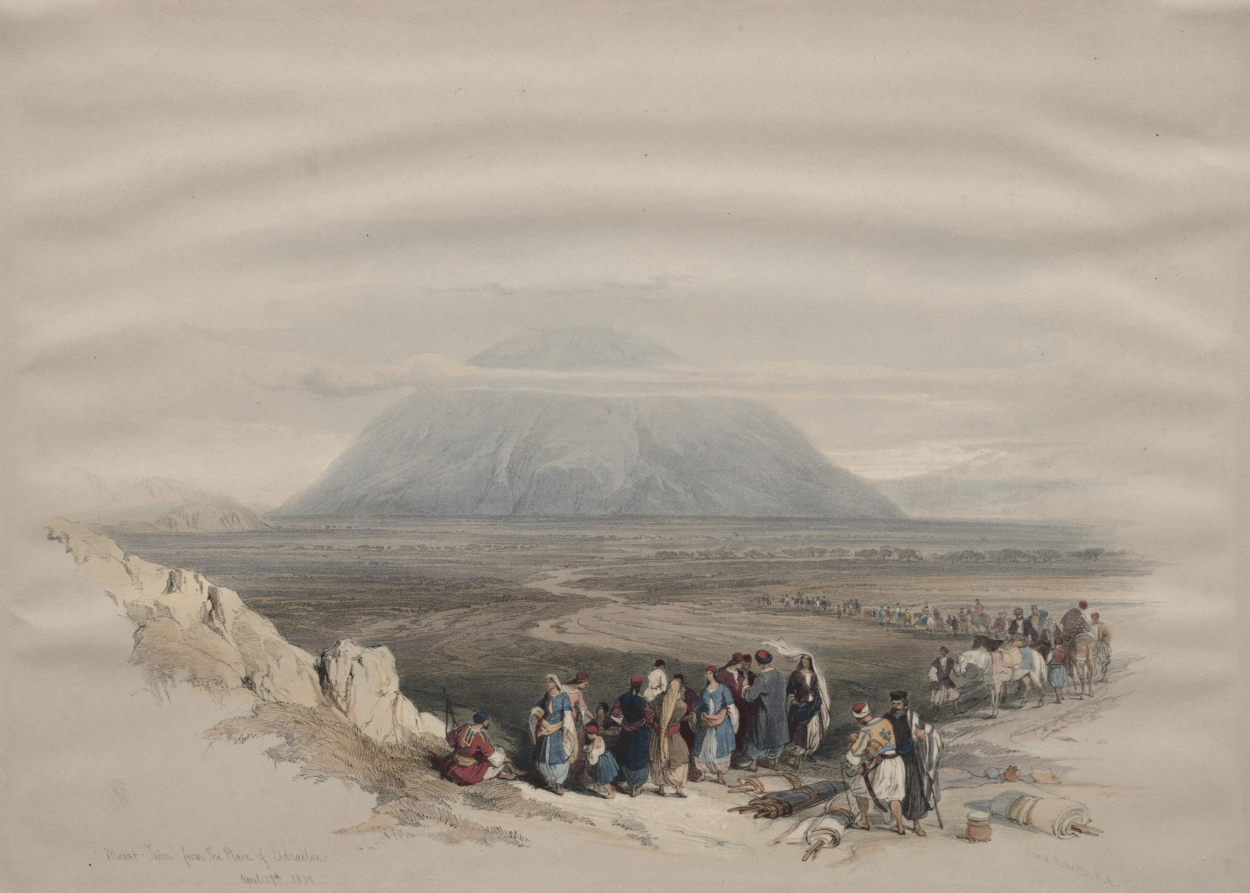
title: Mount Tabor from the Plain of Esdraelon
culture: England, 19th century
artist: David Roberts (Scottish, 1796–1864)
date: 1839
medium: color lithograph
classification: Print